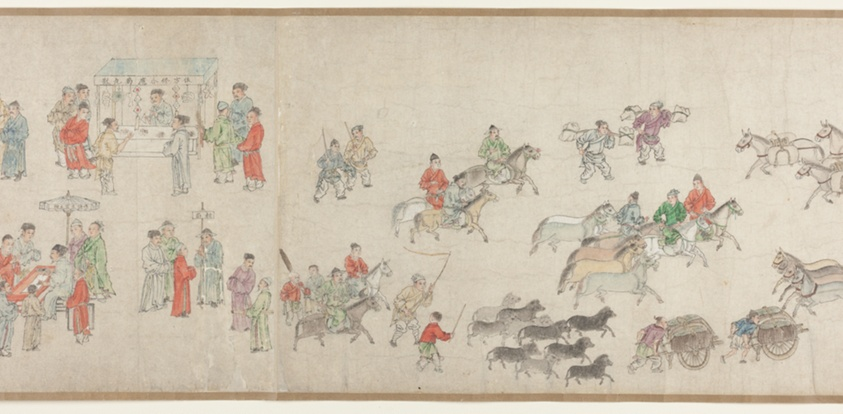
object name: Painting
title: Street Scenes in Times of Peace 太平風會圖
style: Chinese (culture or style)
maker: Zhu Yu (Zhu Junbi) 朱玉（朱君璧）; Chinese, 1293-1365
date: Yuan dynasty (1279–1368), 14th century 元朝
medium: Handscroll; ink and colors on paper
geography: China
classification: handscroll; painting; asian art